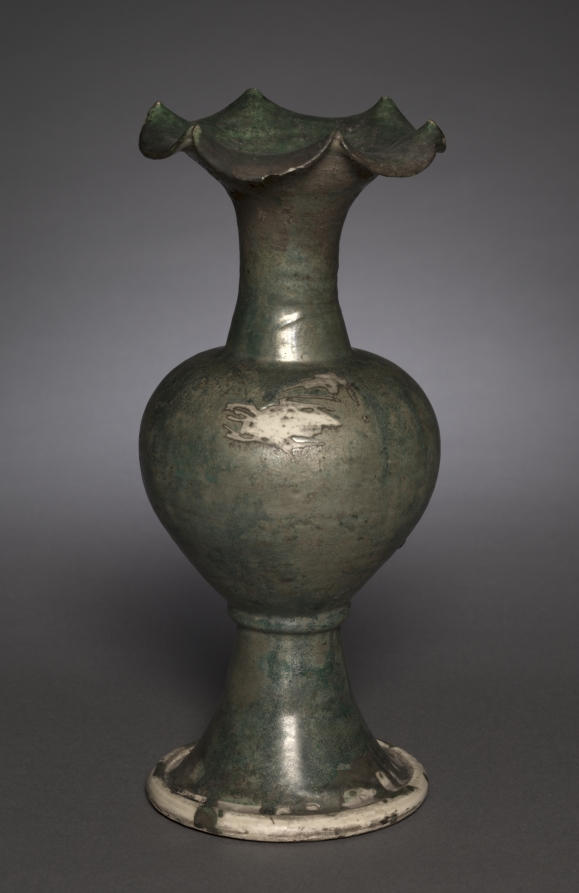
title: Vase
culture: Northern China, Liao dynasty (916-1125) or Northern Song dynasty (960-1127)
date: 1000s–1100s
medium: green-glazed stoneware with underglaze white-slip coating, Cizhou ware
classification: Ceramic